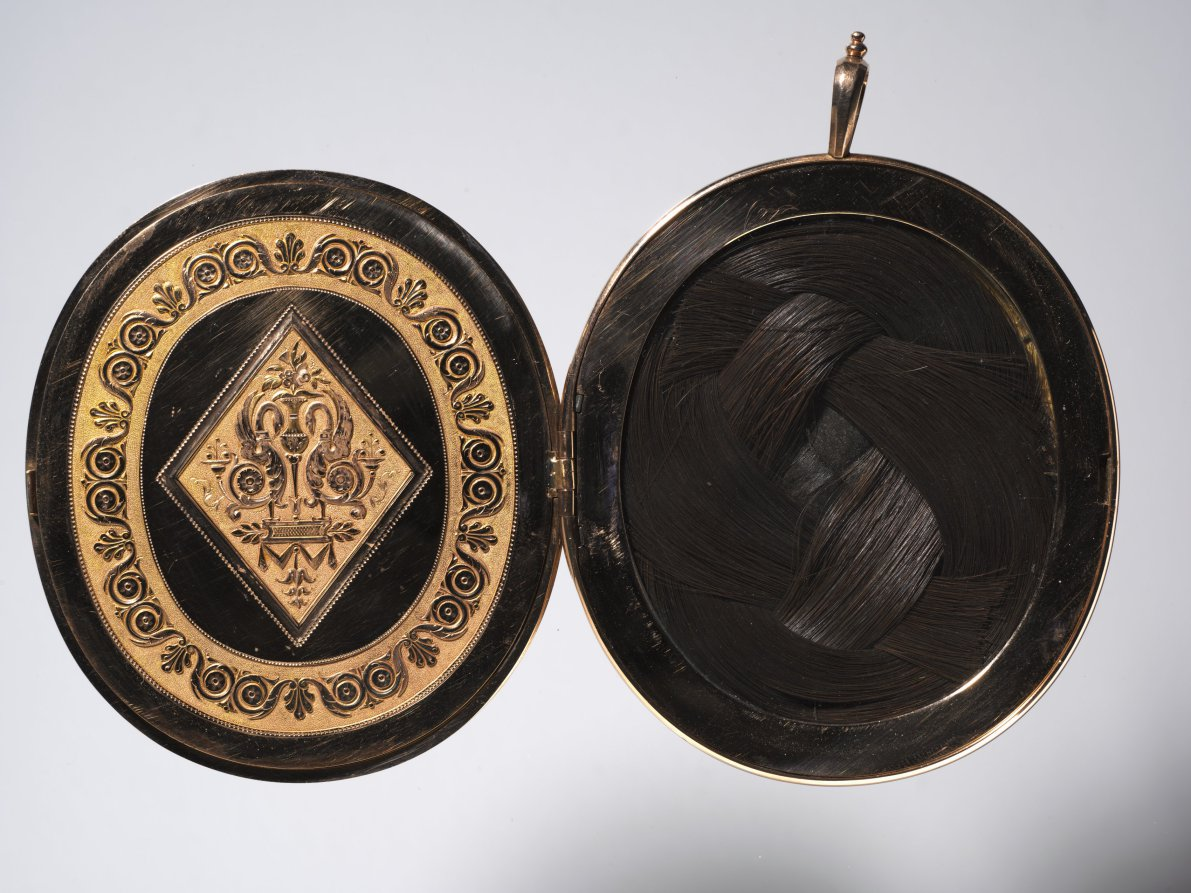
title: Portrait of Louis-Philippe, Duke of Orléans, later King of the French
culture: England, early 19th Century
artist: Richard Cosway (British, 1742–1821)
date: 1804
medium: watercolor on ivory in a gold locket frame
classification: Portrait Miniature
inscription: signed on backing: Rdus Cosway / R.A. et F.S.A. / Primarius Pictor / Serenissimi Walliae / Principie / Pinxit / 1804.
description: Louis-Philippe (1773–1850, king of the French 1830–48) was the son of Louis-Philippe Joseph, duc d’Orléans, who was known as Philippe-Egalité during the French Revolution. The Orléans family was a branch of the House of Bourbon. This work was painted while Louis-Philippe was in exile and living in England from 1800 until 1815, when Napoleon abdicated. He finally succeeded Charles X as king of France in 1830. During the February Revolution of 1848, Louis-Philippe was again forced into exile in England where he died two years later. Richard Cosway had painted Louis-Philippe (as well as his siblings and father) when the family was in England immediately following the outbreak of revolution in 1789. Louis-Philippe would have been thirty-one years old when this work was executed. He wears the Order of the Holy Spirit, a chivalric order of the French monarchy, which can be distinguished by its white dove surrounded by green flames at the center of a Maltese cross, with fleur-de-lis between the arms of the cross. Instead of the brilliant turquoise and white cloud background traditionally associated with Cosway, this miniature has the more restrained, gray, hatched background that characterizes the artist’s later works. The surface of the work is much marred by an irreversible crystallization of the paint layer that further emphasizes the gray tones throughout. The form of the unmarked case is typically English, but the motif is French, which may indicate a French goldsmith imitating the English style. The motif resembles a swan composed of foliate scrolls. A lock of plaited brown hair is also enclosed under glass within the locket, facing the miniature.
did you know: Without DNA analysis it is impossible to know to whom the hair belonged, though the most likely candidate is Louis-Philippe himself.